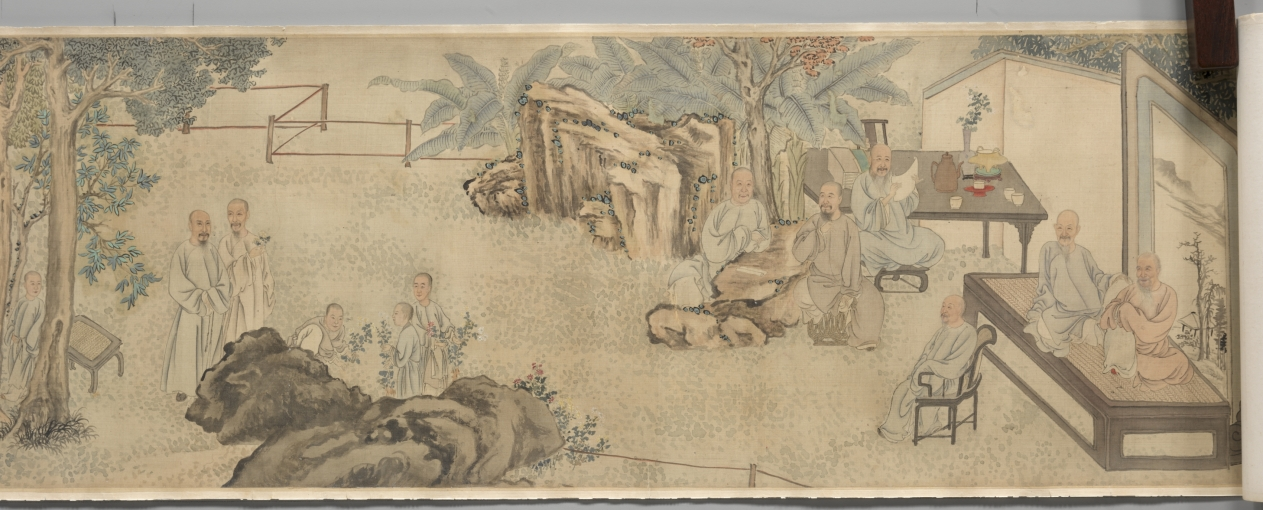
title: The Ninth Day Literary Gathering at Xing’an [Temporary Retreat]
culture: China, Qing dynasty (1644-1911)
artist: Fang Shishu (Chinese, 1693–1751)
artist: and Ye Fanglin (Chinese, active late 1600s–mid-1700s)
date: 1743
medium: Handscroll; ink and color on silk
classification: Painting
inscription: Fang Shishu's seal at beginning of painting: Ou ran shi de 偶然拾得. Ye Fanglin's seal at end of painting: Fanglin 芳林. Frontispiece title dated 1743 and 3 seals of Chen Bangyan 陳邦彦 (1678-1752).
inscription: 行庵在揚州北郭天寧寺西隅，馬君嶰谷半槎兄弟購僧房隙地所築，以為游息之處也。寺為晉謝太傅別墅。西隅饒古木，䨴鬱陰森，入林最僻，不知其近郛郭。庵居其中，無斲礱髤采之飾，惟軒庭多得清蔭，來憩者每流連而不能去。乾隆癸亥九日，積雨既收，風日清美，遂約同人，咸集於斯，中縣［懸］仇英白描陶靖節像，采黃花，酌白醪為供，乃以人世難逢開口笑，菊花雖插滿頭歸分韻賦詩。陶陶衎衎，觴詠竟日。既逾月，吳中寫真葉君敬［震］初適來，群貌小像，合為一卷，方君環山補景，命曰九日行庵文讌圖。裝池成，將各書所作於後，而囑鶚為之記。記按圖中共坐短榻者二人：右箕踞者，為武陵胡復齋先生期恆；左抱膝者，為天門唐南軒先生建中也。坐繩床者二人：中手牋者，歙方環山士庶；左仰首如欲語者，江都閔玉井華也。一人坐藤塾捻髭者，鄞全謝山祖望也。一人倚石坐若凝思者，臨潼張漁川四科也。樹下二人：離立把菊者，錢唐厲樊榭鶚；袖手者，錢唐陳竹町章也。一人憑石床坐撫琴者，江都程香溪先生夢星也。聽者三人：一人垂袖立者，祁門馬半查曰璐；二人坐瓷塾，左倚樹、右跂腳者，歙方西疇士疌 、汪恬齋玉樞也。二人對坐展卷者，左祁門馬嶰谷曰琯，右吳江王梅沂藻也。一人觀者，負手立於右，江都陸南圻鐘輝也。從後相倚觀者一人，歙洪曲溪振珂也。童子種菊者三人：樹間侍立者一人，撰杖、執卷者各一人。其植有蕉、有竹，又有雜樹，作丹黃青碧之色，紀時也。夫重九佳名，舉俗所重，而高常侍歎獨坐而搔首，陸天隨感登高以剫門，無其時地與人耳。今吾儕幸生太平，遇勝地，又皆素心有文之侶，固人世不可多得之會；而此十六人者，或土斷，或客游，聚散不常。異日者，歲月遷流，撫節物以有懷，一披此圖，悅如晤對。將來覽者，或亦不異此意乎。甲子夏五十有四日厲鴞記並書。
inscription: 揚州為江北大都會，居民連甍接楹，笙歌輿從，竟日喧聚，其於淸歌雅集，葢罕矣。城北天寧寺，為晉謝公駐節時所游息，其中有行庵，吾友馬君嶰谷、半查兄弟之小築也。地不踰五畝，而老樹古藤，森蔚相望，皆千百年物，間以修竹，春鳥秋蟲，更唱迭和，其間曲廊高榭，位置閑適。出門未數百步，即黃塵濁流極目，令人作惡。而此中獨蕭然有人外之思。乾隆八年九日，嶰谷兄弟招集同社一十四人祀陶公，出所藏仇實父白描像懸於閣上，各賦一詩。予方留滯西泠，未得預也。又踰旬而予至，諸君方擬繪圖記事，嶰谷曰：是不可無君。乃以展日更舉，令予得陪卷軸之末；而洪君曲溪，兩度皆以病失約，然故吟社中人也，亦補入焉。予太息謂諸君曰：謝公之風流，千古如在；然其游息於斯也，則與東山賓從之樂稍不同矣。公之為是行也，蓋以符氏之亂，思北定中原也。而其時公巳困於讒口，不自安於朝；雖在河朔極有可乘之會，而神明內索，徘徊不克自前。老師左次，竟無尺寸之功，坐失事幾。吾常過邵伯之埭，吊法雲之荒祠，未嘗不喟然累啼，以為明德之衰也。至若九日嘉名，陶公高格，固在羲皇懷葛之間；然而讀其 止酒之詩，蒼梧漢水之感，以瘦詞寄其孤憤則夫黃花白酒，蓋亦不得巳而漫與焉者。今吾輩生逢太平之日，書淫墨癖，是處留連，胸次中了無一事，為江湖之幸民，論人雖甚媿，論其時與地，則不可不私相慶也。諸君曰：善。圖之詳巳見於厲君樊榭記中。予之許為嶰谷兄弟序斯圖也，三年於茲；今夏重披圖捉筆，而唐丈南軒，巳化為異物矣。對酒當歌，人生幾何，願與諸君並日相遇從焉。丙寅夏杪孤山社小泉翁全祖望序。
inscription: 6 additional colophons and 15 additional seals: 1 colophon, dated 1746, and 1 seal of Huang Zhijun 黃之雋 (1668-after 1746); 1 colophon and 2 seals of Zha Xiang 查祥 (1718 jinshi); 1 colophon, dated 1746, and 3 seals of Zhang Siwen 張思問; 1 colophon, dated 1748, and 4 seals of Shao Dong 卲東 (1721 jinshi); 1 colophon, dated 1753, and 2 seals of Fang Shiju 方世舉 (signing as Fang Funan 方扶南); 1 colophon, dated 1808, of Ruan Yuan 阮元 (1764–1849); 3 seals unidentified.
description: By the 1700s, Yangzhou was flourishing both economically and culturally as the most prosperous city in China, having surpassed all other Jiangnan cities in their creation of gardens. This group portrait commemorates a literary gathering in the private garden of the salt merchants and art patrons Ma Yueguan (1688–1755) and his brother Ma Yuelu (1697–after 1766) in Yangzhou. Ma Yueguan received imperial recognition for providing financial aid and food relief for those affected by flood and drought. Ma Yueguan is seen seated at the end of the painting holding an open scroll while Ma Yuelu stands behind the qin instrument player. Among the guests were officials, scholars, poets, painters, and merchants, a mix of local members of a poetry club reflecting increasing social diversity.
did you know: The two hosts and their fourteen guests were all officials, scholars, poets, painters, and salt merchants.